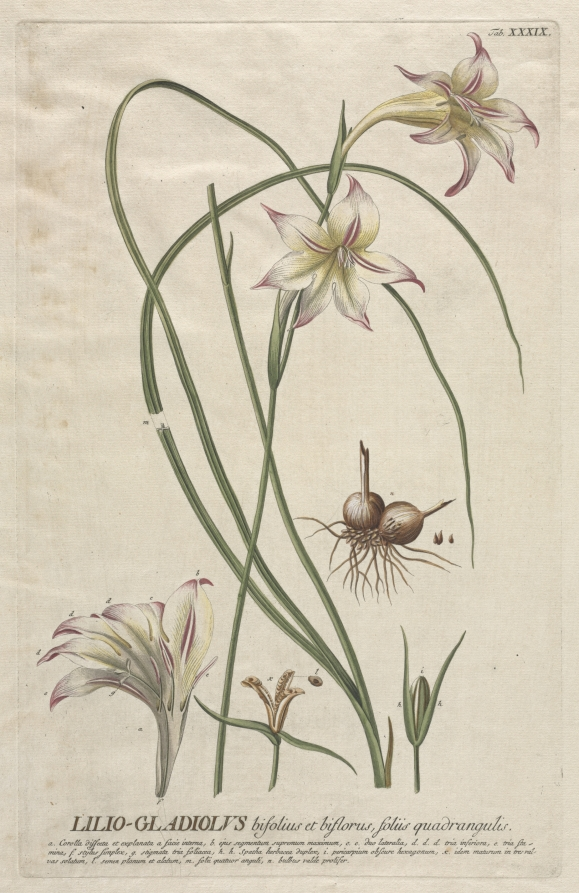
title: Plantae Selectae: No. 39 - Lilio-Gladiolus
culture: Germany, 18th century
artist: Georg Dionysius Ehret (German, 1708–1770)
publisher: Christopher Jacob Trew (German, 1695–1769)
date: published 1750–73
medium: engraving, hand-colored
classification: Print